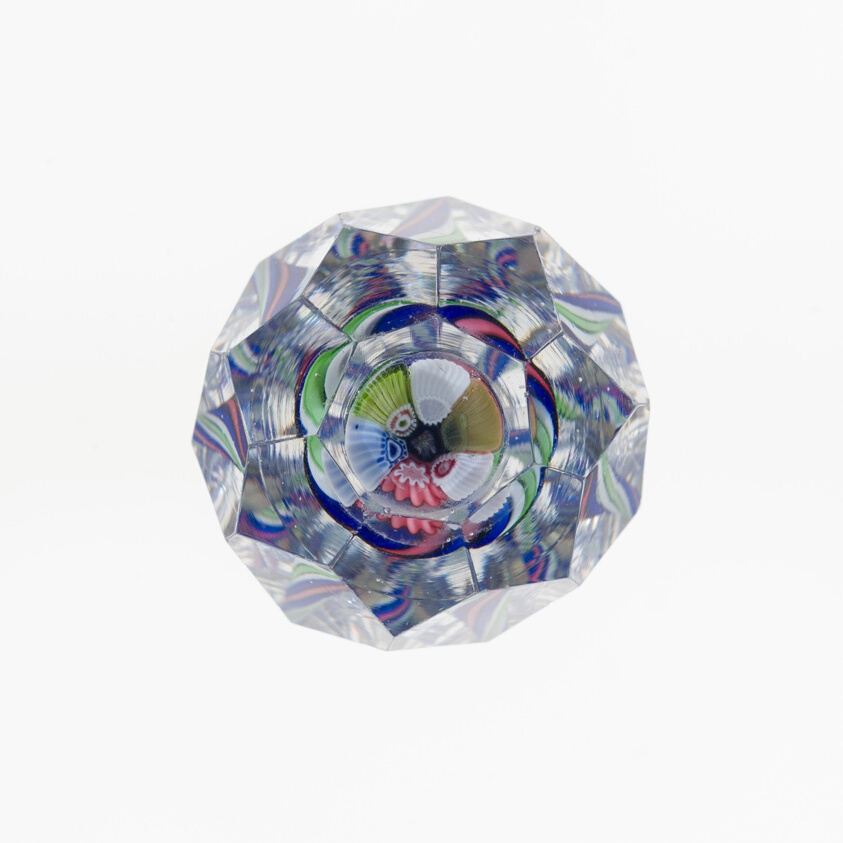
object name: Glass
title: Paperweight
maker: American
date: c. 1880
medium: Glass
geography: United States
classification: paperweight; lampwork; glass; european decorative arts